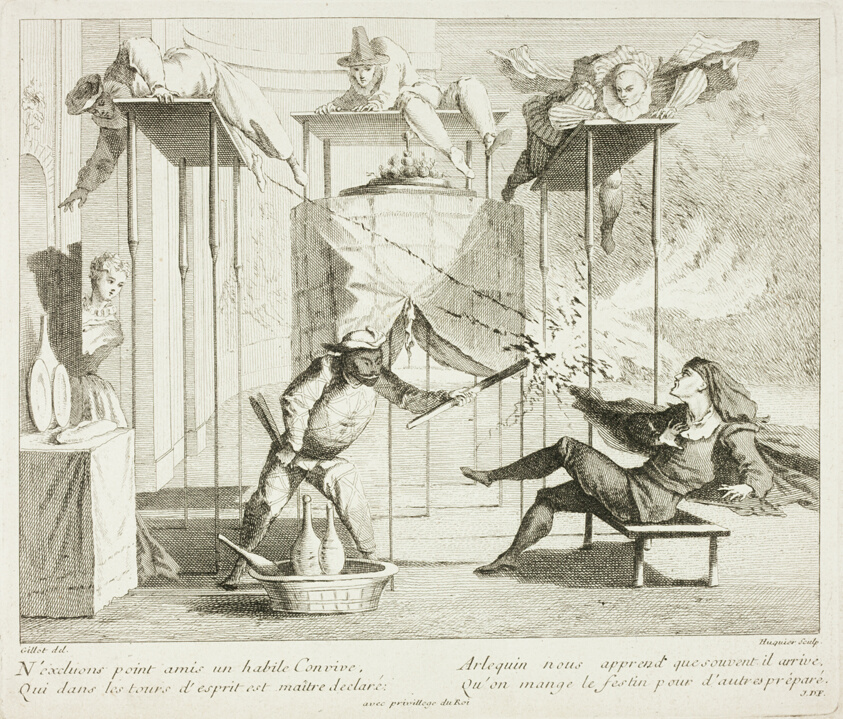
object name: Print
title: Plate from Livre de Scènes Comiques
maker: Gabriel Huquier (French, 1695-1772); after Claude Gillot (French, 1673-1722)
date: 1729/32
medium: Etching on paper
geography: France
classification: etching; print; prints and drawing